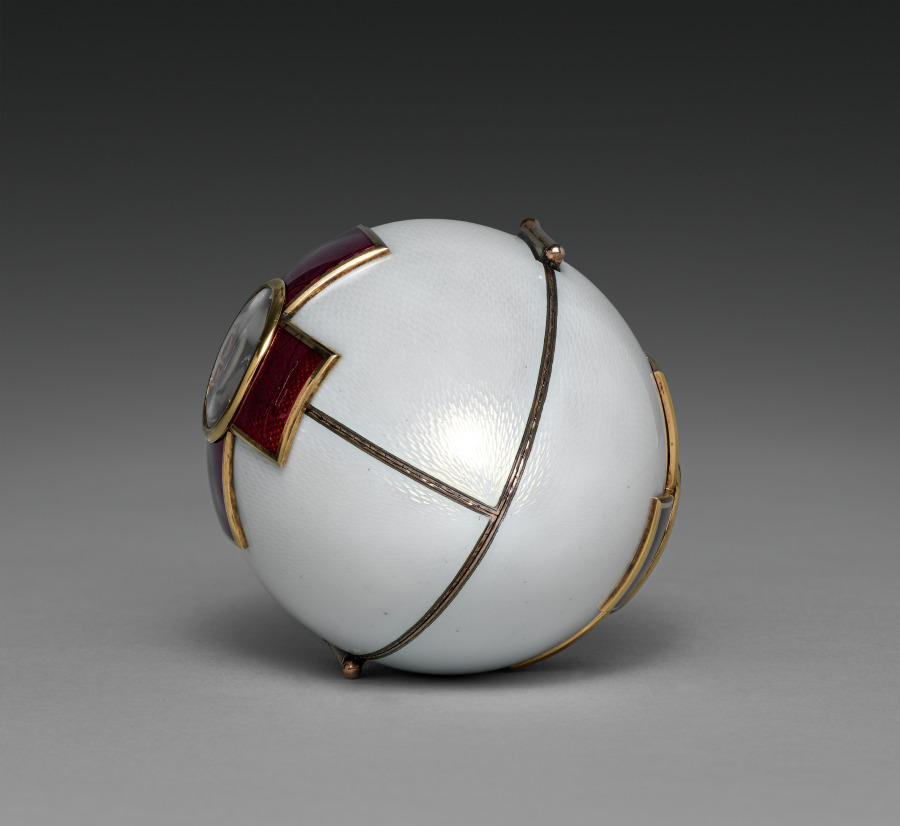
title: Imperial Red Cross Easter Egg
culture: Russia, St. Petersburg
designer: Peter Carl Fabergé (Russian, 1846–1920)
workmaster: Henrik Wigström (Russian, 1862–1923)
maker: House of Fabergé (Russian, 1842–1918)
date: 1915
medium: gold, silver gilt, enamel, glass, ivory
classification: Miscellaneous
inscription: inscribed on interior of egg: symbols for Alpha and Omega and imperial crown for Alexandra Feodorovna; 1915; inscriptions in Cyrillic, Old Church Slavonic, and Roman letters which identify Sts. Olga and Tatiana and presumably describe the central scene of the triptych.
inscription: Inscribed on silk velvet and satin lined case: double-headed eagle, Fabergé, Petersburg, Moscow, London (all in Cyrillic on lining of case); 17.559, abbreviation for "Red Cross" (in Cyrillic in red ink on outside of case).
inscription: Hallmarks: 72, Kokoshnik, lower case alpha in script [assay mark of St. Petersburg, 1908-26]; H.W. [initials of workmaster Henrik Wigström]; Fabergé (in Cyrillic).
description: The House of Fabergé made two imperial Easter eggs in 1915 that honored the contributions of Tsarina Alexandra and her two eldest daughters, Olga and Tatiana, to the war effort as Red Cross Sisters of Mercy. Compared to other Fabergé eggs elaborately ornamented with jewels, the eggs reflected the mood of austerity in Russia during World War I. This version becomes an icon when opened, revealing miniatures of the patron saints of the tsarina’s daughters. After the Russian Revolution, this relic of the Tsarist past was sold by the Soviet government to raise needed cash for the treasury.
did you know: This egg was confiscated by the Bolsheviks during the Russian Revolution and sold by the government of Josef Stalin in the 1930s to raise money for the Soviet treasury.